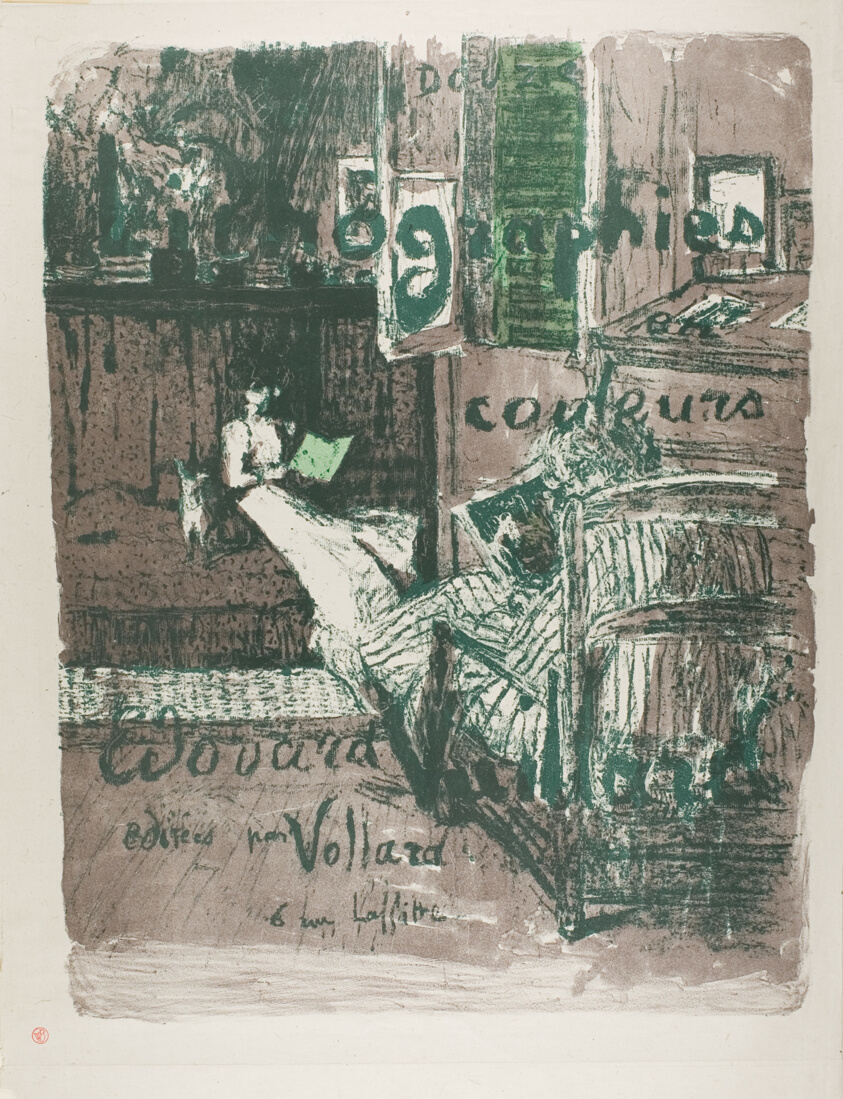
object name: Print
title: Album Cover for Landscapes and Interiors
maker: Edouard Vuillard (French, 1868-1940); printed by Auguste Clot (French, 1858-1936); published by Ambroise Vollard (French, 1867-1939)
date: 1899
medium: Color lithograph on grayish-ivory laid China paper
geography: France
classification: lithograph; print; prints and drawing